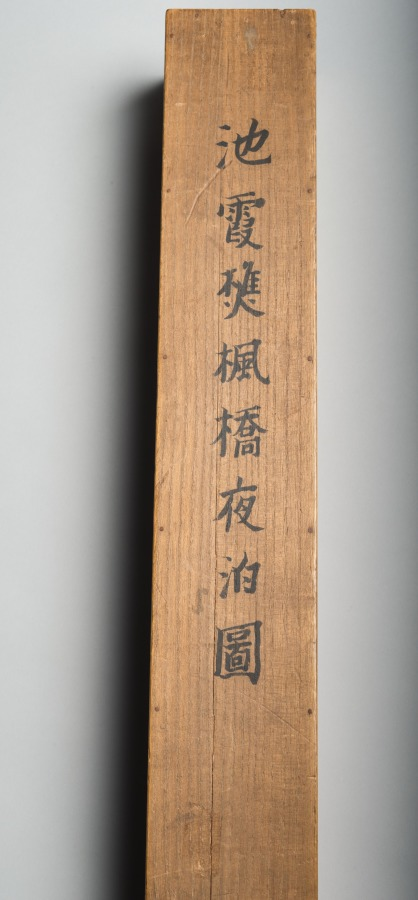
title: Illustration of Zhang Qi's Poem on the Cold Mountain Temple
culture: Japan, Edo period (1615–1868)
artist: Ike Taiga (Japanese, 1723–1776)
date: mid- to late 1700s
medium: hanging scroll; ink and color on paper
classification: Painting